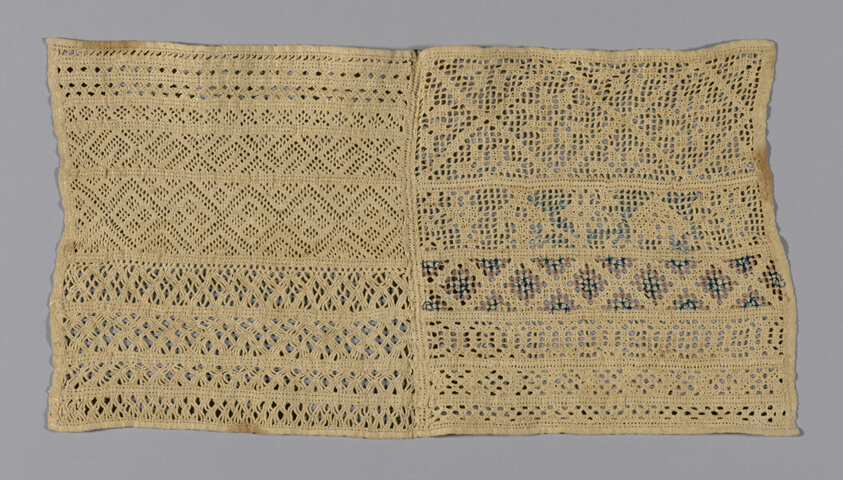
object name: Textile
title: Sampler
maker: Spain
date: 19th century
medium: Linen, plain weave; cut and drawn work; embroidered with cotton yarns in buttonhole, darning, hem, Italian hem, interlocking overcast, serpentine hem, and square openwork, stitches; coral knots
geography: Spain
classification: textile; needlework (visual works); sampler